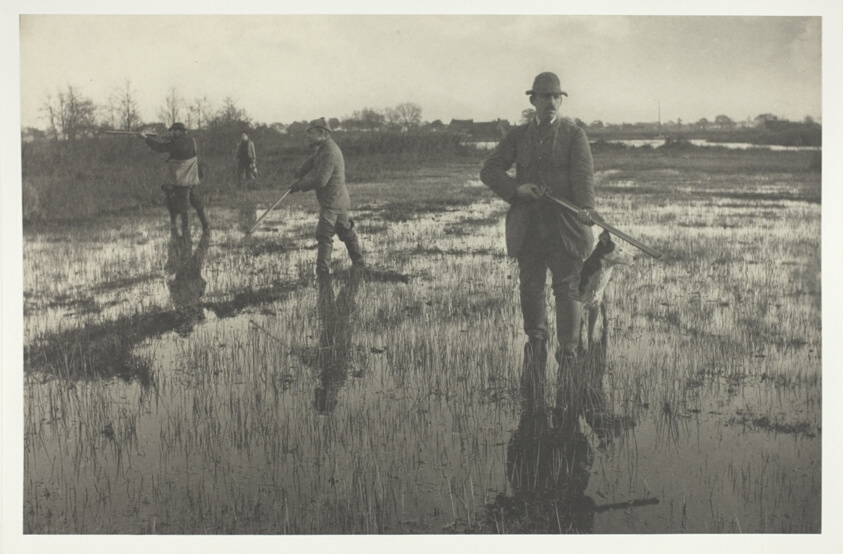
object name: Photograph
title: Snipe-Shooting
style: 19th century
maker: Peter Henry Emerson (English, born Cuba, 1856–1936)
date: 1886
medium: Platinum print, pl. X from the album "Life and Landscape on the Norfolk Broads" (1886)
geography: England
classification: platinum print; photographic process; photography; photograph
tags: dogs, animals